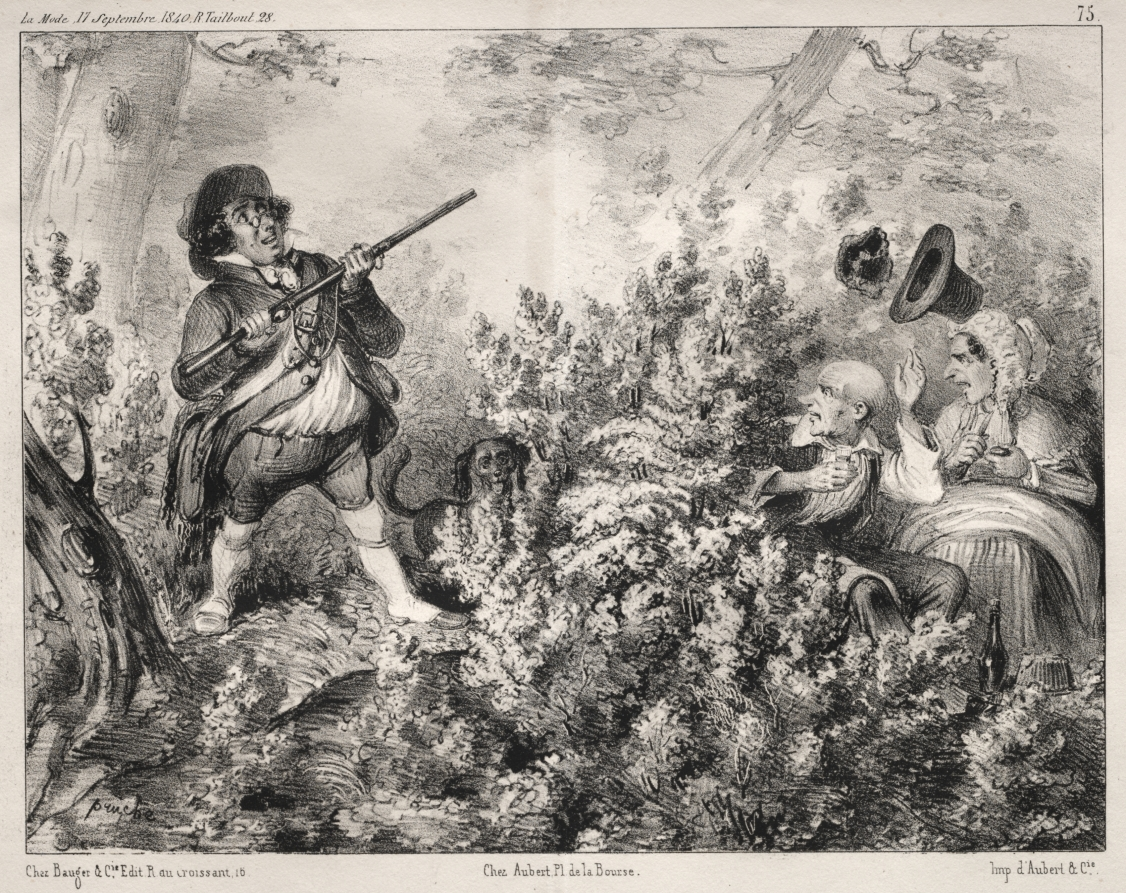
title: Actualités: L'Ouverture de la Chasse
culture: France, 19th century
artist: Clémente Pruche (French, 1831–1870)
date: 1840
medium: lithograph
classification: Print